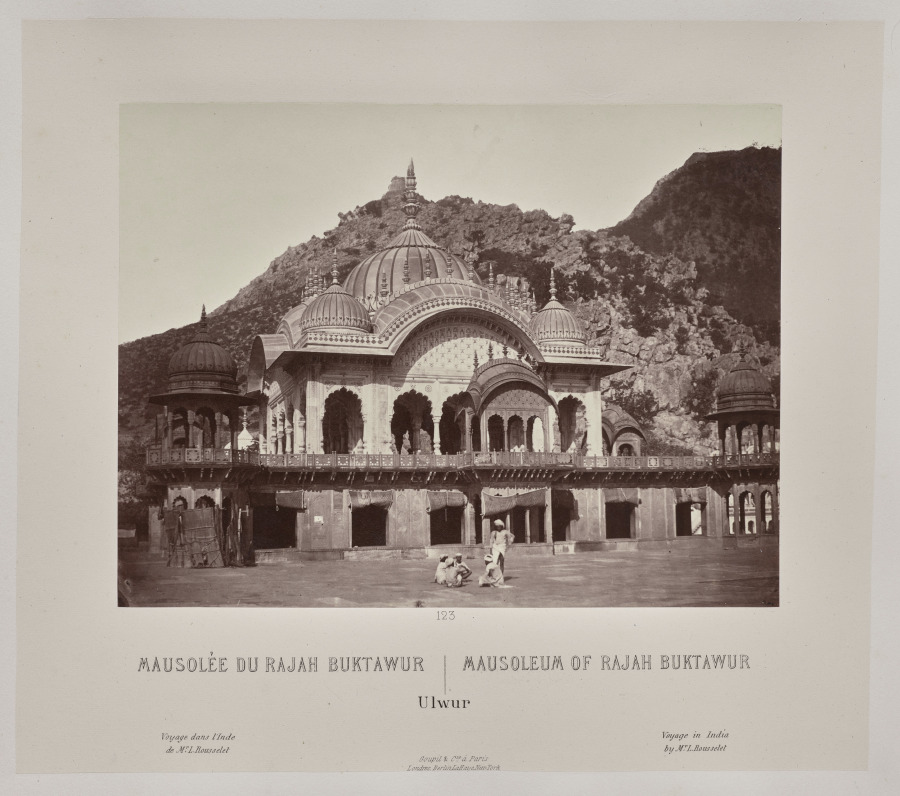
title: Mausoleum of Rajah Buktawur, Ulwur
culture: France, 19th century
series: India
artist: Louis-Théophile Marie Rousselet (French, 1845–1929)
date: 1865–68, published 1869–70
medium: Albumen print from glass plate negative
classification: Photograph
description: Concerned that his drawings did not do justice to the splendor of India’s monuments, Rousselet learned photography in India that year, a remarkable accomplishment. He proved to be a talented photographer with a sophisticated sense of composition. The scenes in this volume sweep across sites of Sultanate, Rajput, and Mughal power in northern India, from the sacred Hindu city of Varanasi on the Ganges River to Alwar in Rajasthan. Also included are several scenes of industry and portraits of Indian rulers.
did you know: Louis Rousselet described himself as a “scientific traveler” when he went to India alone at age 18 in 1863 and stayed into 1868.